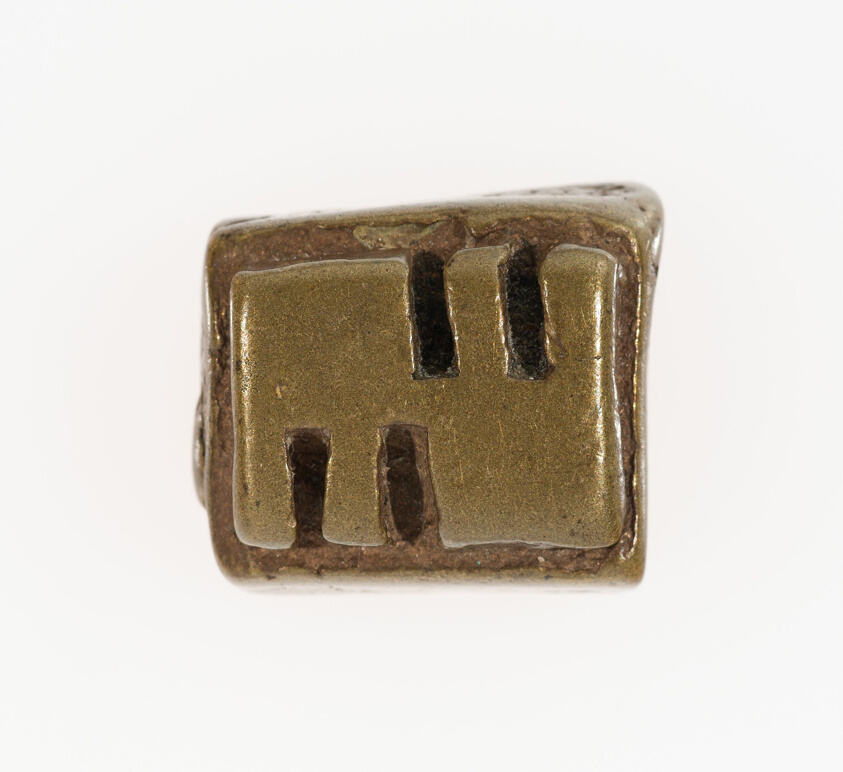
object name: Decorative Arts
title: Goldweight with a Geometric Design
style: asante, Arts of Africa, akan, african Art, Coastal West Africa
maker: Asante or related Akan-speaking peoples; Ghana; Coastal West Africa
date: 18th/19th century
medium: Copper alloy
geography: Ghana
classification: gold-weight; metal; arts of Africa; measure; african art; decorative arts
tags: geometric motif